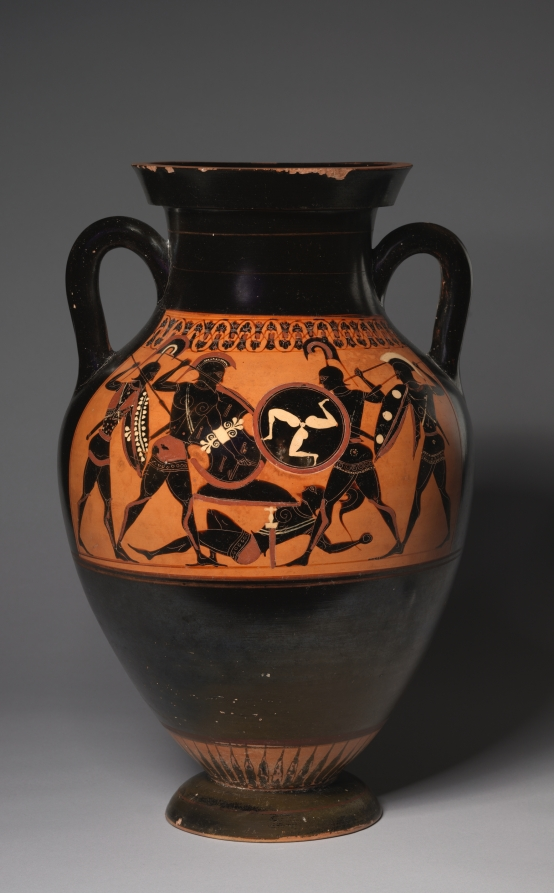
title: Black-Figure Amphora (Type B; Storage Vessel): Battling Warriors (A); Dionysos and Satyrs (B)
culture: Greek, Attic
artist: attributed to The Bateman Group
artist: manner of Lysippides Painter (Greek, Attic, active c. 530–515 BCE)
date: c. 530–520 BCE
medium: ceramic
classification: Ceramic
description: Formerly owned by John Bateman, Esq., this amphora provided a name for the Bateman Group, five amphorae likely decorated by a single painter. On either side, a reserved panel holds a carefully composed scene: four striding soldiers above a fallen warrior; and four dancing satyrs around the wine god Dionysos. Similar scenes appear on other Bateman Group vases, as well as in the much larger body of work attributed to the more well-known Lysippides Painter.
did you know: This vase was already old-fashioned when first made; its shape was preferred by earlier generations of vase painters.